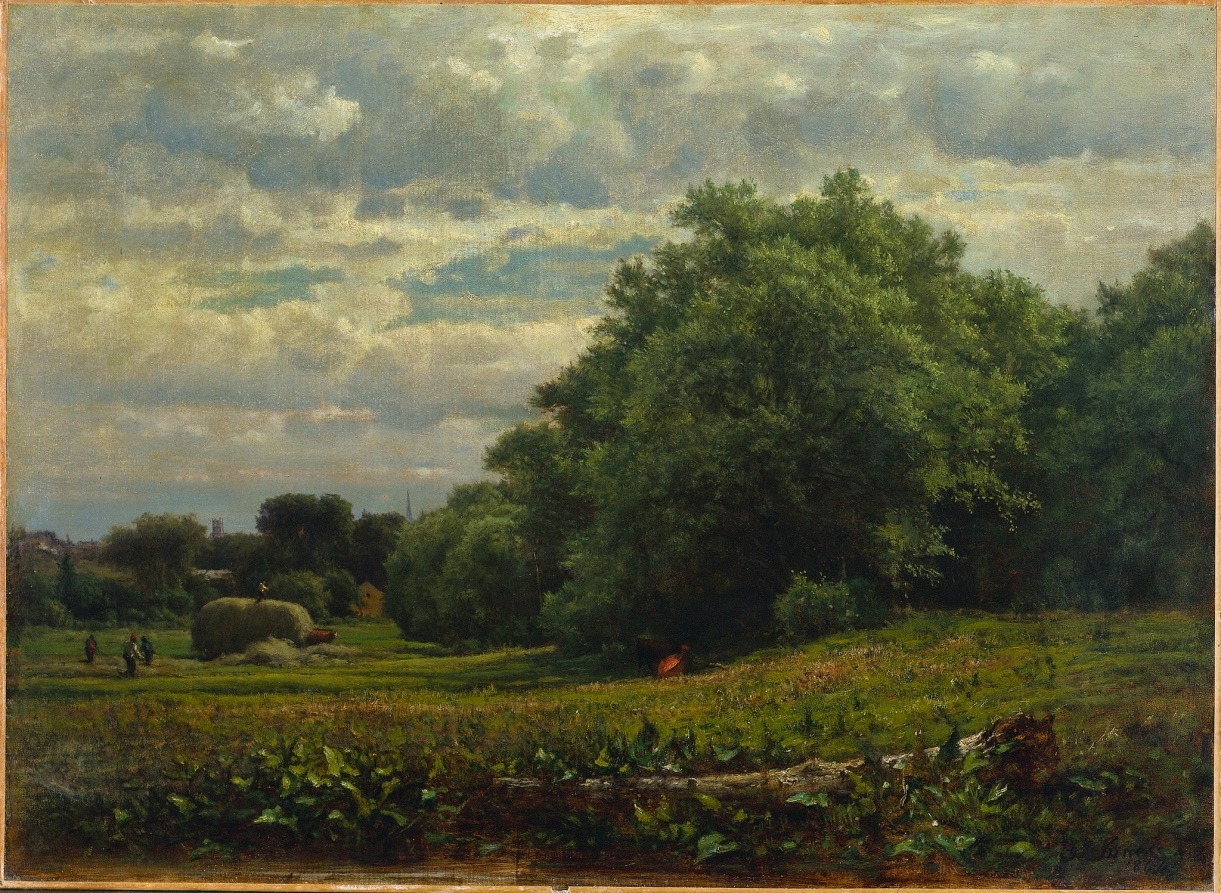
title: Harvest Time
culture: America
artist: George Inness (American, 1825–1894)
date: 1864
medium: oil on canvas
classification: Painting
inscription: Signed lower right: "G. Inness / 1861"